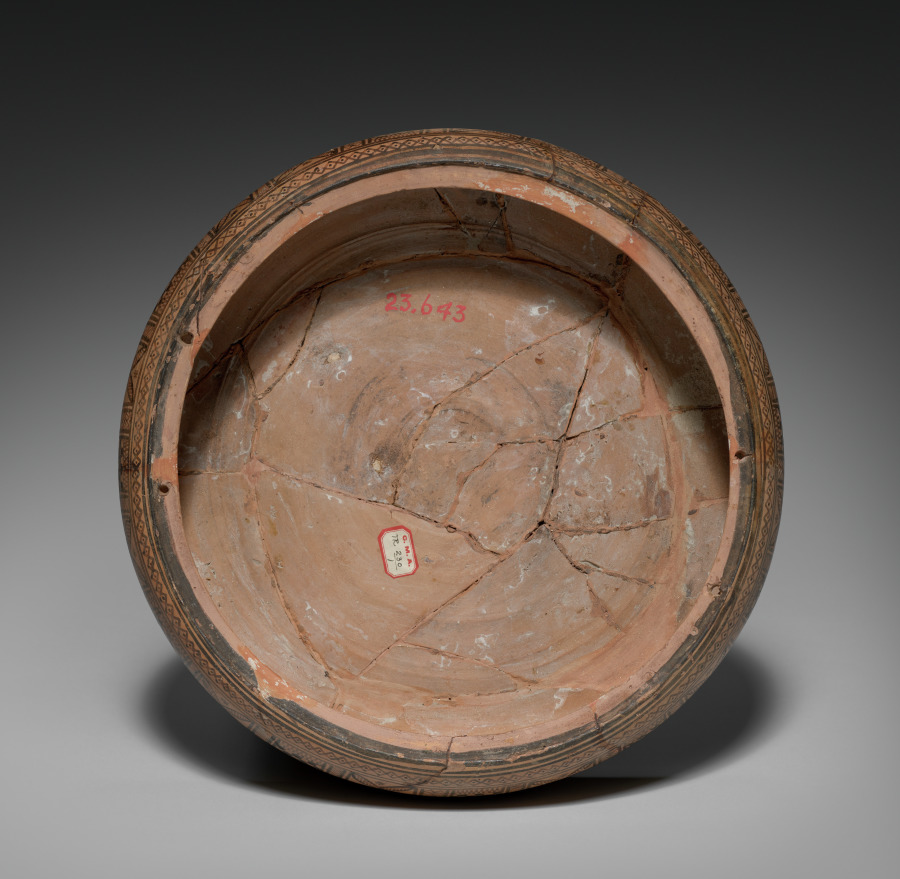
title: Geometric Horse Pyxis (Cylindrical Box)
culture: Greek, Attic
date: c. 760–750 BCE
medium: ceramic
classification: Ceramic